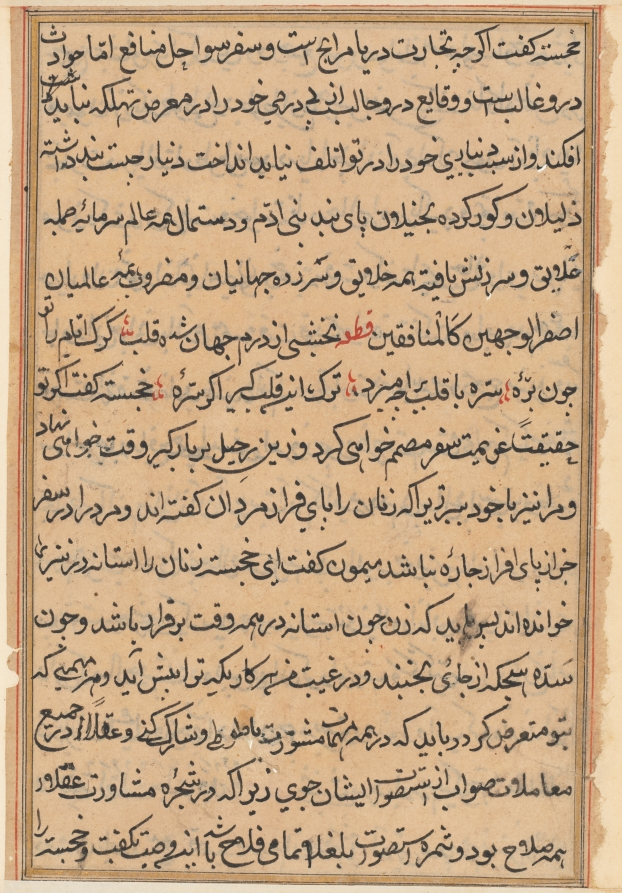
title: Page from Tales of a Parrot (Tuti-nama): text page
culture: Mughal India, court of Akbar (reigned 1556–1605)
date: c. 1560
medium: gum tempera, ink, and gold on paper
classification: Painting